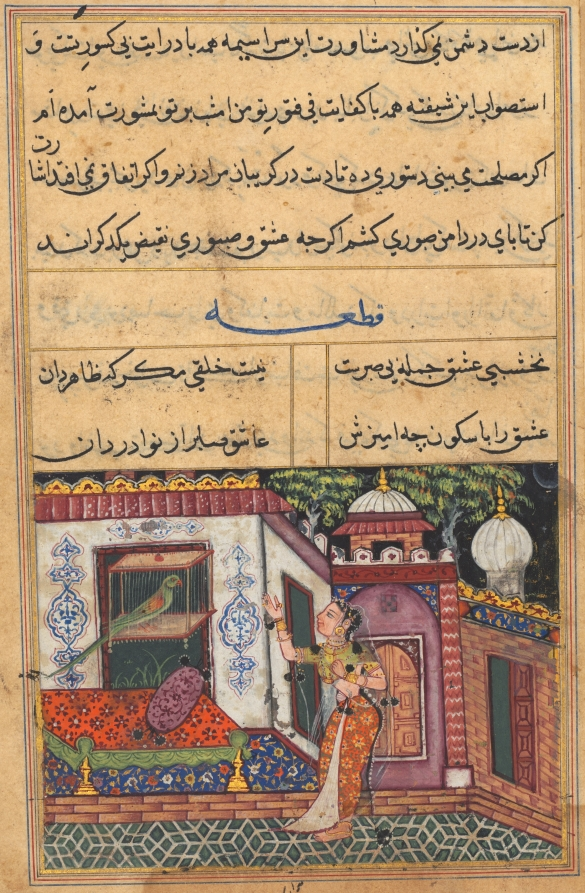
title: The Parrot Addresses Khujasta at the Beginning of the Eleventh Night, from a Tuti-nama (Tales of a Parrot)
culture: Mughal India, court of Akbar (reigned 1556–1605)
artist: Banavari 2 (Indian, active 1550s-1590s)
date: c. 1560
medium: gum tempera, ink, and gold on paper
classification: Painting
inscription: banwārī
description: When the lover of the ocean—the sun—entered his place of retirement in the west and the beloved of the stars— the moon—came out of the bride’s apartment in the east, Khujasta with eyes wet like the sea and tears like brilliant gems went to Tuti to ask his permission to leave. . . . Eleven days and nights have come and gone since Khujasta fell for a local prince. Each night, having prepared herself for a lovers’ rendezvous, her husband’s pet parrot has beguiled her into staying up all night listening to his stories at home. On this night, he tells her that it is good that she has sought his advice on going out, for “[Anyone] who seeks counsel in regard to his affairs and secures advice on his problems will see exactly what the Brahman saw.” Unable to stem her curiosity, she asks the parrot what he saw.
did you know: Two painters named Banavari are known to have been active during the Akbar period.